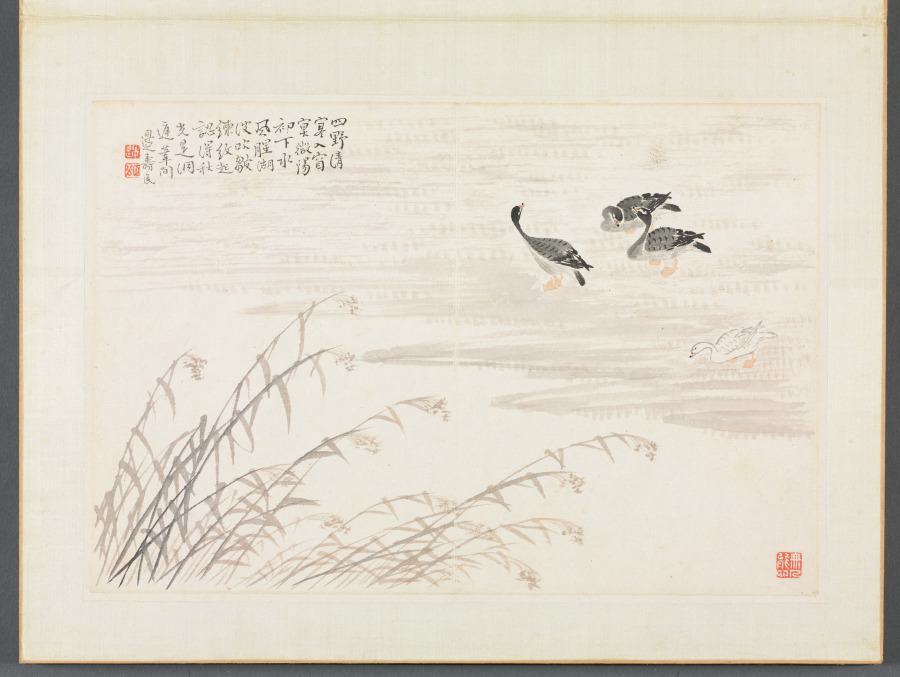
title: Album of Calligraphy and Paintings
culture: China, Qing dynasty (1644-1911)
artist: Bian Shoumin (Chinese, 1684–1752)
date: first half of the 1700s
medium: album leaf; ink and color on paper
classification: Painting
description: The artist Bian Shoumin is known for his depiction of wild geese, water, and reeds. The migrant birds in autumn and winter evoked, in the minds of the Chinese intelligentsia, a time of parting and sorrow.